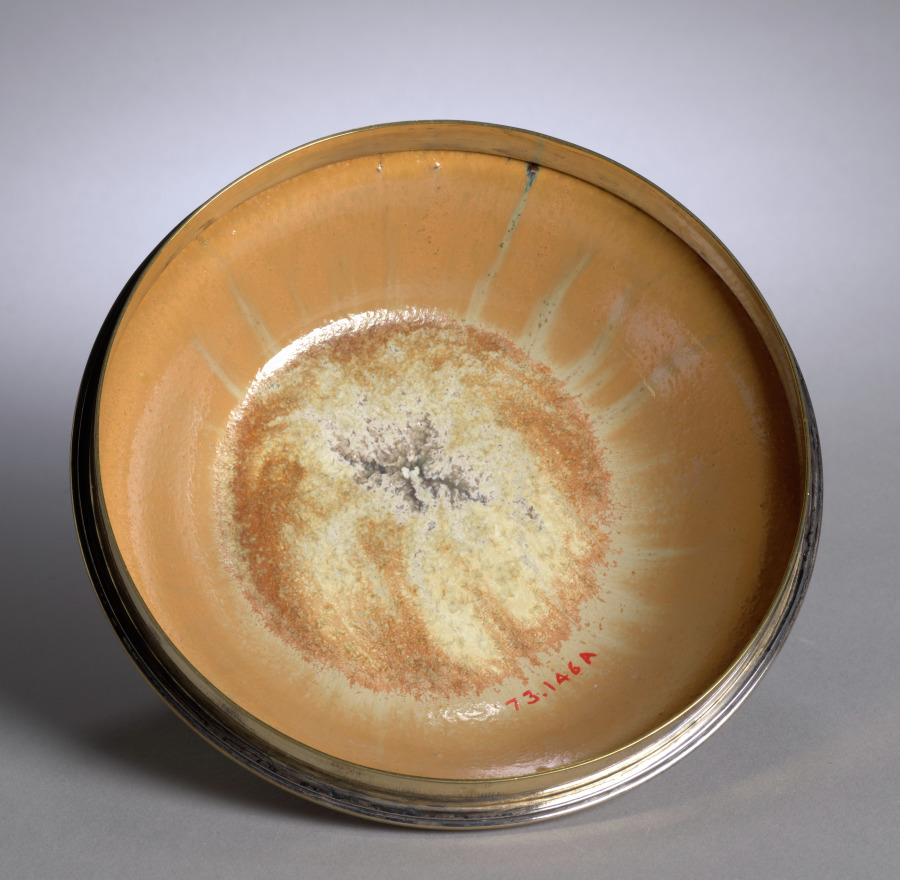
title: Cover for a Bowl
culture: France, late 19th-early 20th Century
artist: Auguste Delaherche (French, 1857–1940)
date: c. 1899–1900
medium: stoneware with metal mounts, silvered and gilded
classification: Ceramic